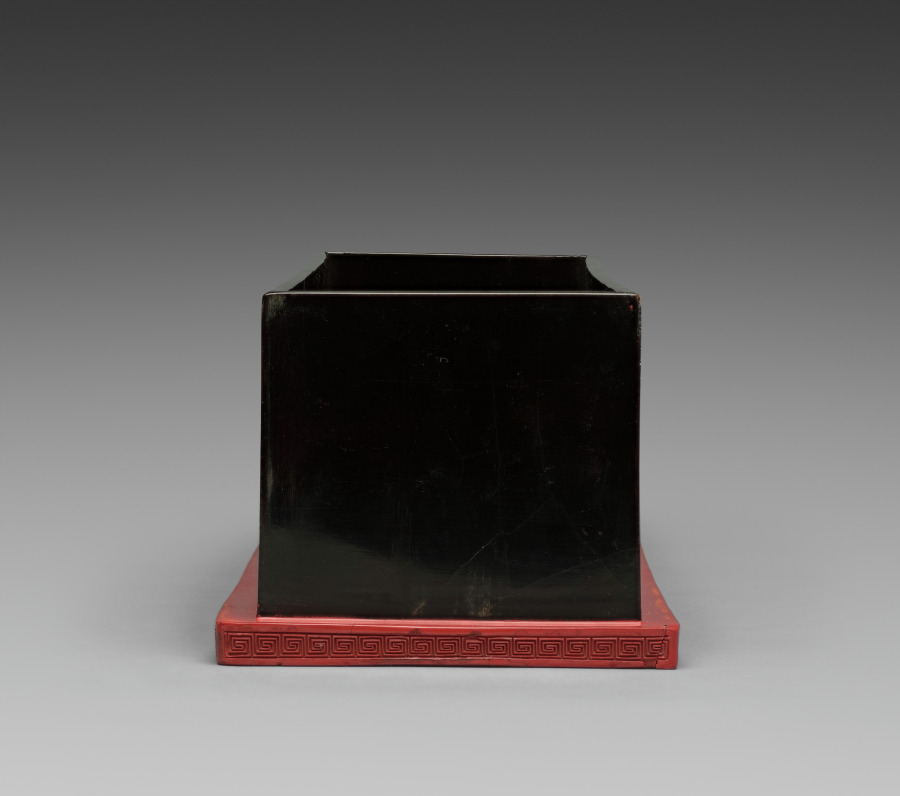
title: Base for a Carved Lacquer Scroll Box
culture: China, Qing dynasty (1644–1911), Qianlong reign (1736–95)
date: 1736–95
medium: cinnabar carved lacquer on wood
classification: Lacquer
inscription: 心寫治平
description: The elaborate design, superior craftsmanship, and inscription carved into the red cinnabar lacquer proclaim the imperial pedigree of this scroll box. On either end appears a five-clawed dragon, a design reserved only for an emperor. More dragons twist and wind through swirling clouds and waves along the length of the box’s sides and top. The carving is intricate and vigorous, while the design is controlled and regular. This box originally housed the handscroll, CMA 1969.31, private portraits of the Emperor Qianlong, his empress, and 11 other favorites among his presumed 40 or more wives during his 60-year reign.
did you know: This is the original box for the handscroll Portraits of the Qianlong Emperor and His Twelve Consorts, CMA 1969.31.